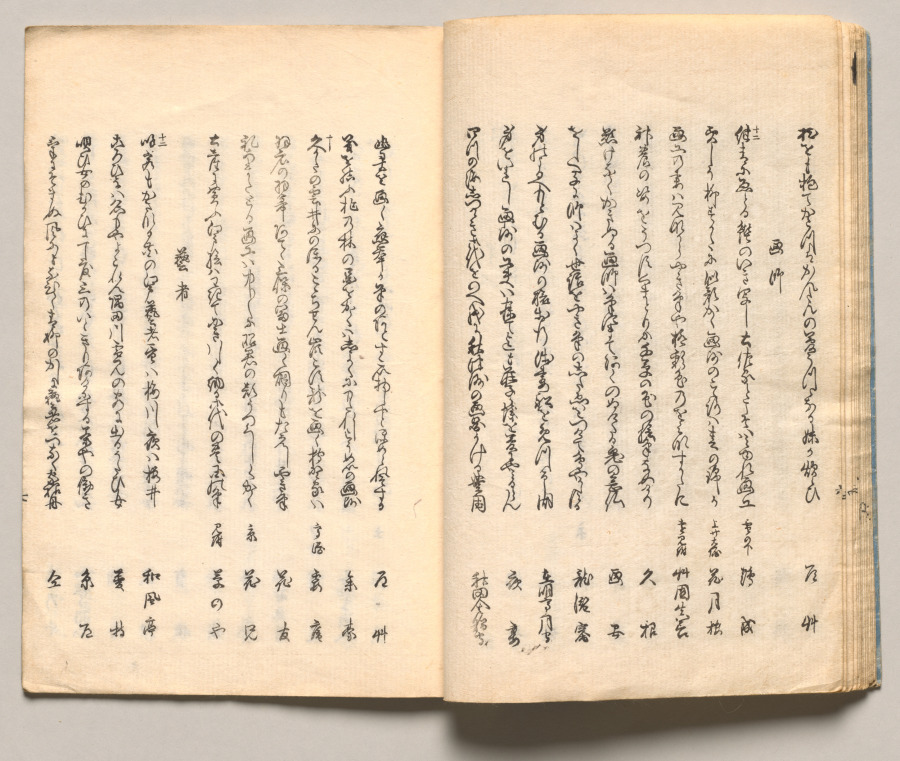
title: Spread Fifteen from Volume One of People of Japan in Light Verse (Kyōka)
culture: Japan, Edo period (1615–1868)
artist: Utagawa Hiroshige (Japanese, 1797–1858)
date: 1857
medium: Woodblock-printed book; ink and color on paper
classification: Bound Volume